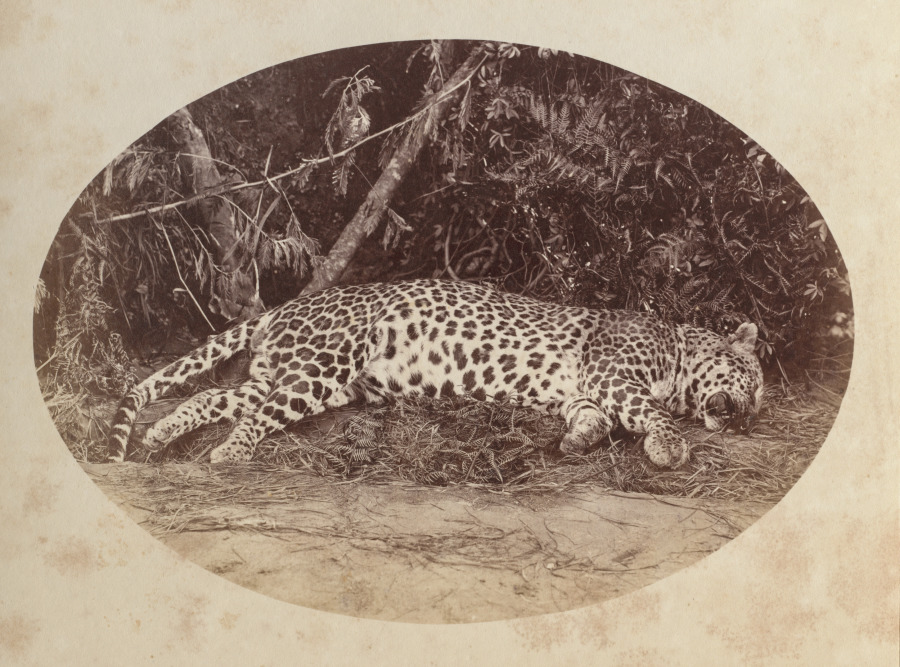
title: Dead Leopard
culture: India, 19th century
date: c. 1880s–90s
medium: albumen print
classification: Photograph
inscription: No visible inscriptions on verso of mount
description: Elaborate big game hunts were a prestigious pastime for the Indians and colonials under the British Raj. This trophy has been laid out for the camera so that its sharp teeth and long tail are visible.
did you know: While the Indian leopard is now a vulnerable species, 19th-century hunters would not have worried about sustaining its population.